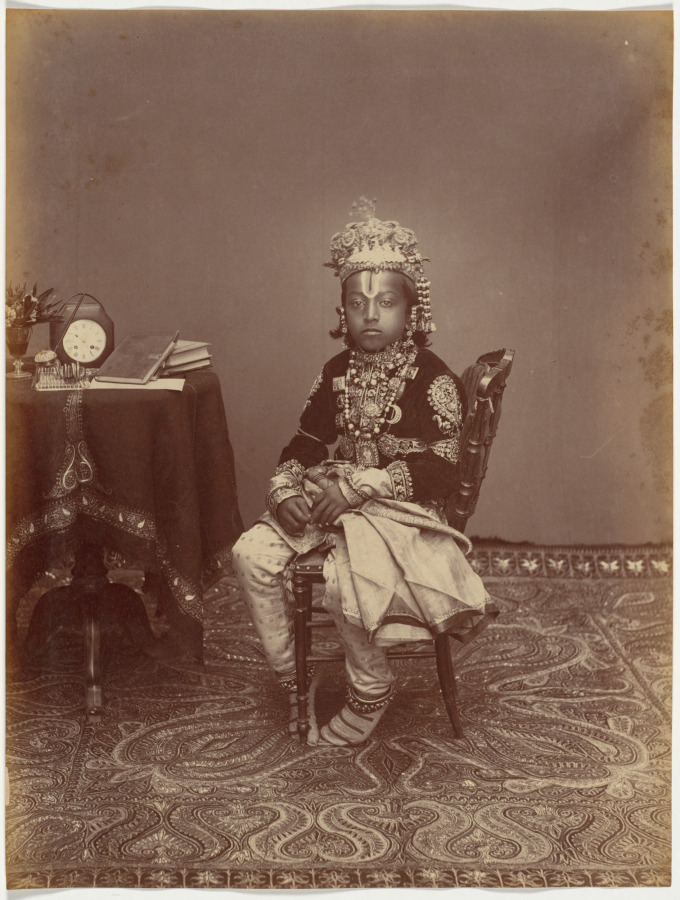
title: His Highness the Maharaja of Rewa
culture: India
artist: Raja Deen Dayal (Indian, 1844–1905)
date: 1886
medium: albumen print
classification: Photograph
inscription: No visible inscriptions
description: Deen Dayal’s status as an Indian person may have helped him gain access to Indian rulers at the start of his career. The year before he received the patronage of British officials, Deen Dayal photographed ten-year-old Venkat Raman Singh (1876–1918; reigned 1880–1918), the Maharaja of Rewa. The studio portrait reveals the boy beneath the crown. He straddles a Western-style chair that is too tall for him, curling under his stockinged feet so they touch the floor. One of his many necklaces holds a painted or photographic portrait similar to the portrait jewel pendant in the nearby case.